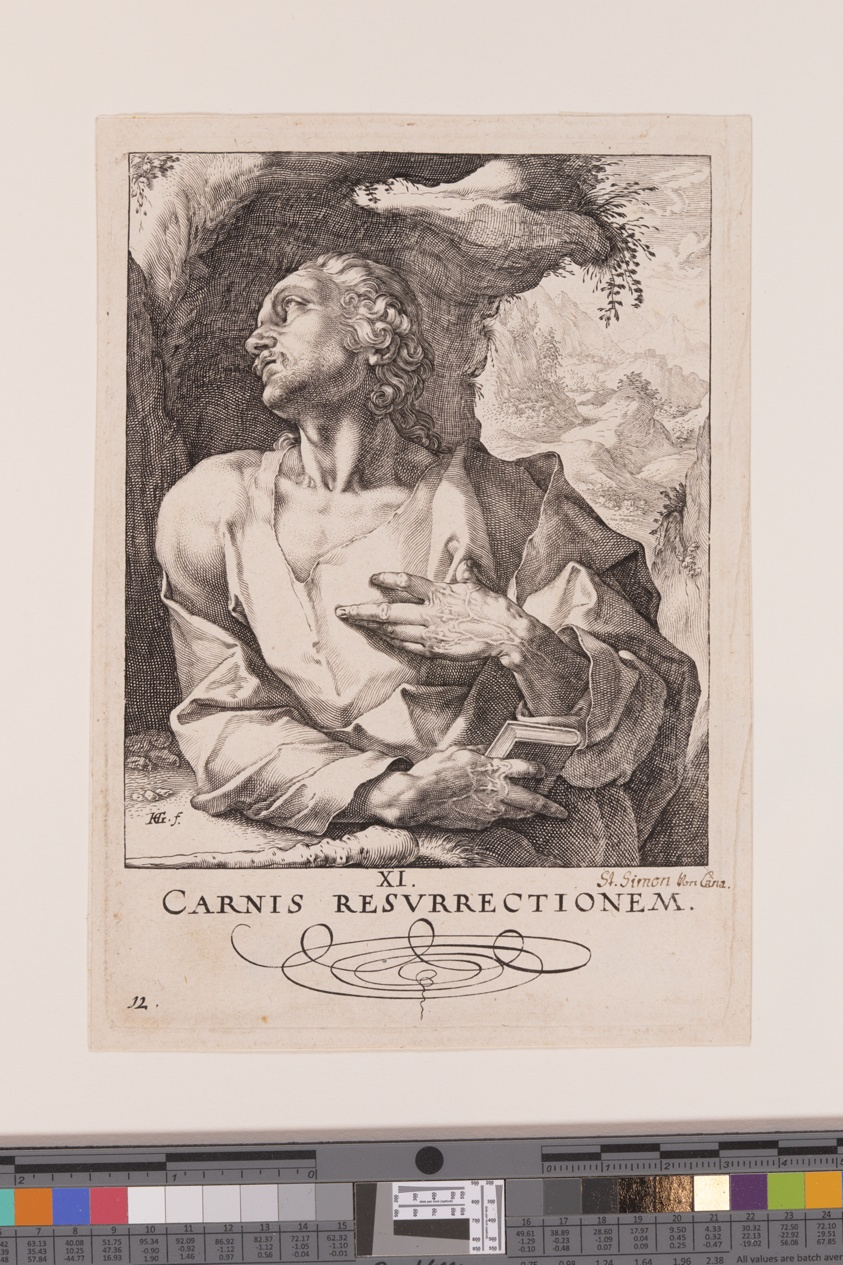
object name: Print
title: St Jude Thaddeus, from Christ, the Apostles and St Paul with the Creed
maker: Hendrick Goltzius (Dutch, 1558–1617)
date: 1589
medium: Engraving on ivory laid paper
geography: Netherlands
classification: engraving; paper; print; prints and drawing